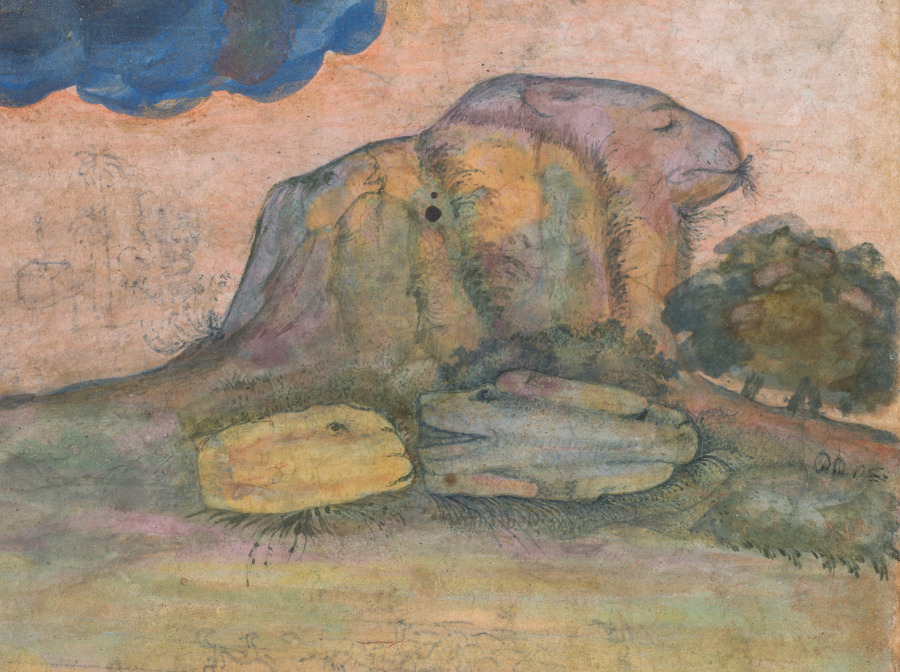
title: Angels bring food to Jesus in the wilderness (folio 55 recto), from a Mirror of Holiness (Mir’at al-quds) of Father Jerome Xavier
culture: Mughal India, Allahabad, made for Prince Salim (1569–1627)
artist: Muhammad Sharif (Indian, active c. 1600)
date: 1602–4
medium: Gum tempera, ink, color, and gold on paper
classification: Manuscript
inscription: Signature of the artist, Muhammad Sharif (Indian, active c. 1600), is written in the tiny pot by Jesus's foot.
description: To end his 40-day fast, five angels brought Jesus refreshments from heaven: breads, melons each with a knife for convenient cutting, fresh leeks, and what appear to be fragrant rice dishes and curries, along with cups of wine. Four of the angels are dressed in robes, and one is clothed only in feathers. After his baptism, Jesus spent 40 days and nights in the desert where he fasted, practiced spiritual exercises, and successfully resisted the temptations of Satan. Many of the rocks in this painting have faces, called grotesques. This page is the only surviving folio from this manuscript that has an artist’s signature, written in the tiny pot by Jesus’s foot.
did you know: The artist has put faces in the rocks, following a Persian convention.